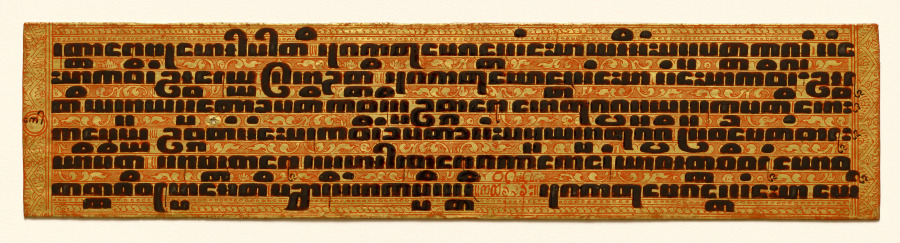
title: Text, folio 9 (verso) from a Kammavacha: Buddhist ordination text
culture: Myanmar (Burma)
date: 1800s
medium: Leaf: lacquer and gilding on cloth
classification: Manuscript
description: In premodern Burma, lay people commissioned lavishly ornamented manuscripts for ceremonial occasions, when officiants would read aloud from the text. Written in black lacquer, the text is in the language of Pali written in a Burmese script. It contains ordination rites and procedures for monastic ceremonies. The second to last page is covered with intricately drawn, winged celestial beings (nats) in gestures of praise. They fly amid intertwining vegetation—denoting bounty—that grows from serpentine forms that refer to rain clouds. Lionlike forms inhabit the space with them. The top and bottom covers are equally ornamented with jeweled floral patterning.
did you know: The Pali text of this manuscript is written in Burmese square script, which is also known as "tamarind seed script."